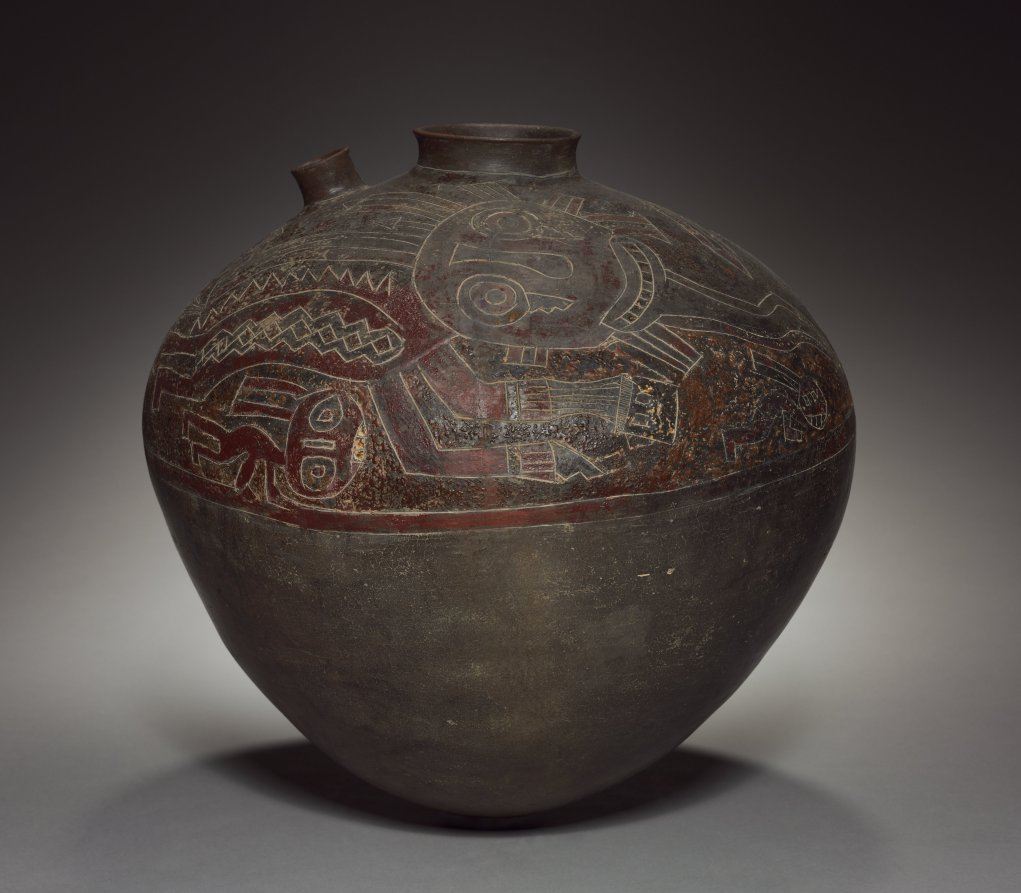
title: Vessel with Oculate Being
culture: Peru, South Coast, Paracas (Cavernas) style (700 BCE–1 CE)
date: 300 BCE–1 CE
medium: earthenware with resin-based paint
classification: Ceramic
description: A supernatural creature known today as the Oculate Being, after its huge eyes, became prominent late in Paracas times. The Paracas left no written records and this creature's meaning is poorly apprehended, but it clutches a severed human head by the hair. A hint of the head's significance comes from the Oculate Being itself, whose head sprouts streamers that may represent abstract energy or force. The severed head cult, then, may have aimed at capturing and redirecting this energy. (Other Paracas objects appear nearby.)